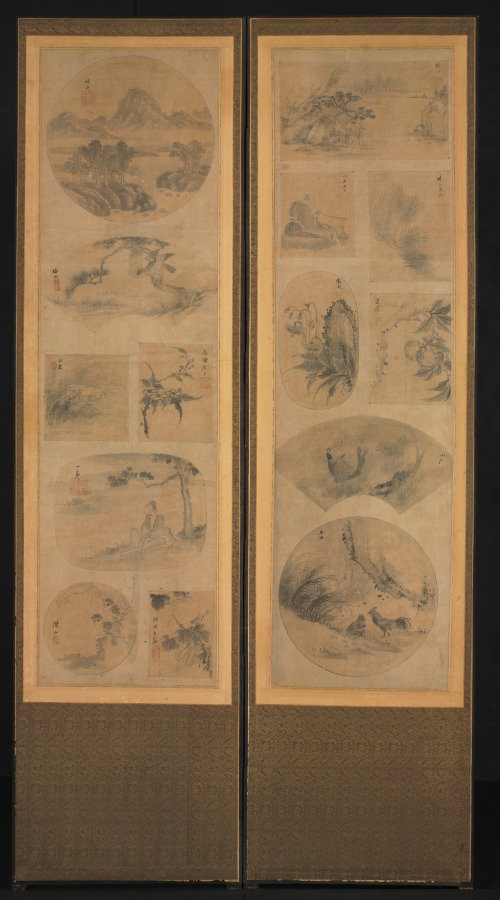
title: Painting of One Hundred Themes (obverse)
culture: Korea, Joseon dynasty (1392–1910)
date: late 1800s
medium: Ten-panel folding screen affixed with album leaves (obverse), calligraphy (reverse), ink and color on silk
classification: Painting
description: This screen depicts paintings on one side and poems on the other—an economical format often used in Korea to allow the viewer to enjoy both sides of one screen. The front features an assortment of bird-and-flower, landscape, and figural paintings executed according to the brush manner of more than 50 artists. A calligrapher has brushed several Chinese poems about the four seasons on the reverse side, among them "Composing in the Daytime of Summer" by Tang poet Liu Zongyuan (773–819) and "Composing when Spring Begins" by Song scholar Zhang Shi (1133–1180).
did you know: Depicting small images of various subjects became one of the most popular types of painting toward the end of the 19th century.